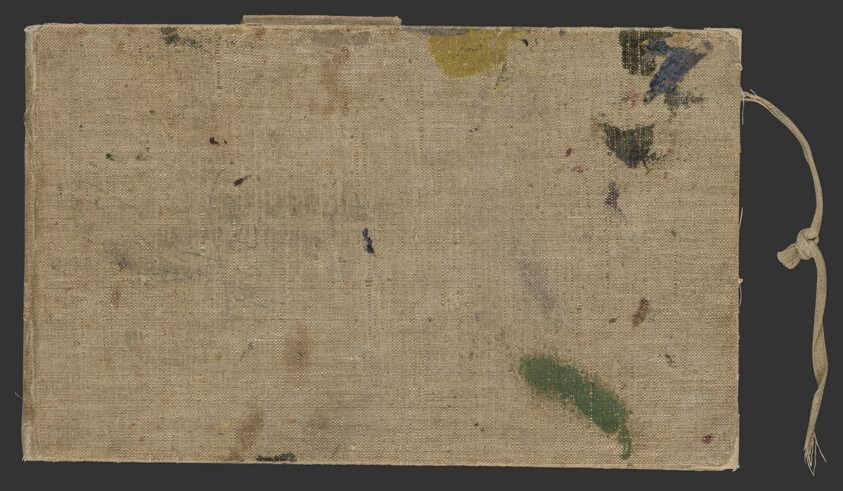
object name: Drawing and Watercolor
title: Sketchbook No. 2 (L'Estaque)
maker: Paul Cézanne; French, 1839-1906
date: 1875–86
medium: Graphite and pen and ink drawings on paper, bound into a book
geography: France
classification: sketchbook; graphite; prints and drawing; paper